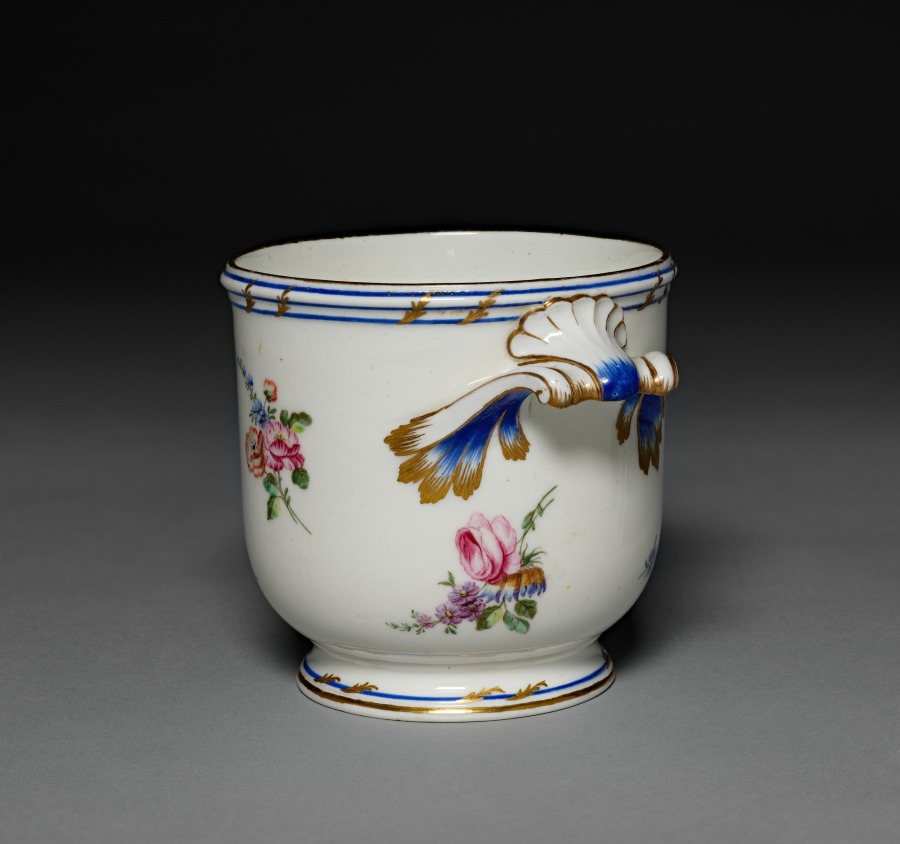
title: Glass Cooler (Seau à verre ordinaire)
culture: France, Sèvres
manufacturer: Sèvres Porcelain Factory (French, est. 1756)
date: 1759–60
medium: soft-paste porcelain with enamel and gilt decoration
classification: Ceramic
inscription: [Painter's mark, possibly for Claude-Joseph Cardin]: "g"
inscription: [Incised]: "LP"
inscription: [Incised] "2"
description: In 18th-century France, wine was traditionally drunk chilled. This object would have held crushed ice or ice water to chill small bottles or glasses. Shifts in the strict dining protocol of 18th-century France under Louis XV meant that bottle coolers would have been placed within reach of the diners, rather than their traditional placement on the side board.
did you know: A bottle cooler of this design was first purchased in 1752 by Madame de Pompadour, great patron of the Sèvres porcelain factory and official mistress of French King Louis XV.